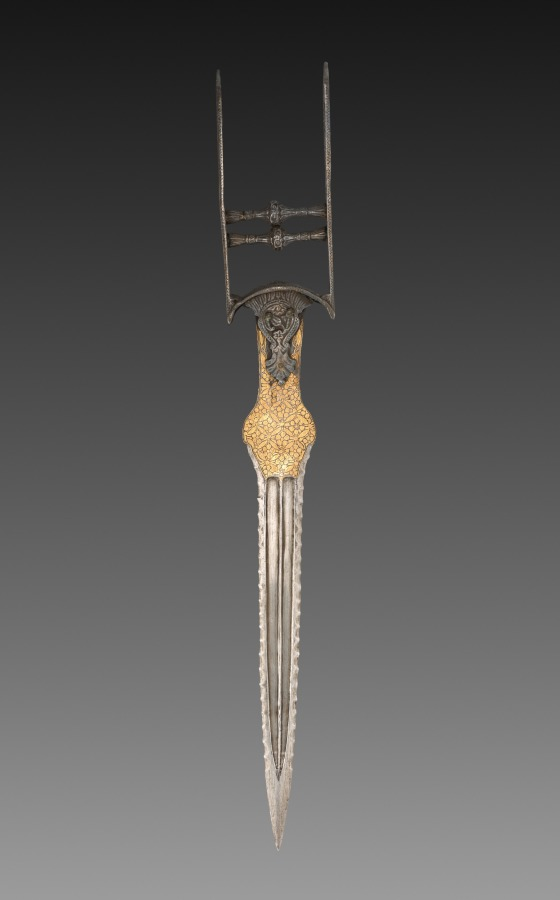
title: Dagger (Katar)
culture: India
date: 1800s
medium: steel with gold damascening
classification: Arms and Armor